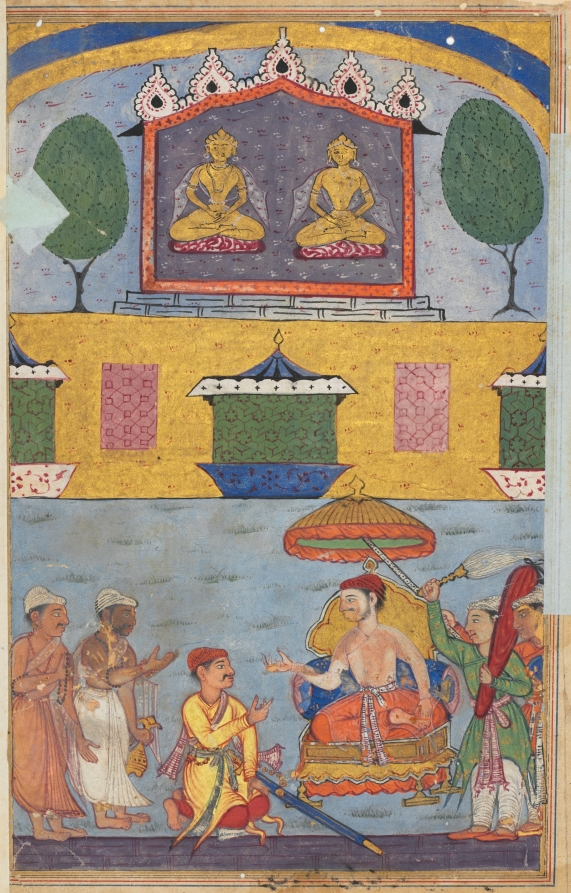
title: The goldsmith and the carpenter inform the king of a dream in which the golden images plan to desert the city for lack of worshippers, from a Tuti-nama (Tales of a Parrot): Third Night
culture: Mughal India, court of Akbar (reigned 1556–1605)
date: c. 1560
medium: gum tempera, ink, and gold on paper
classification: Painting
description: In this story, a goldsmith and a carpenter plan to steal a city’s idols by convincing the king that they have left on their own. They appear before the king, who addresses them from beneath a parasol in the lower register. The two golden idols sit in a shrine in the upper register.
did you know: The dark-skinned figure on the left was originally painted in a peach toned complexion that is still visible on his torso.